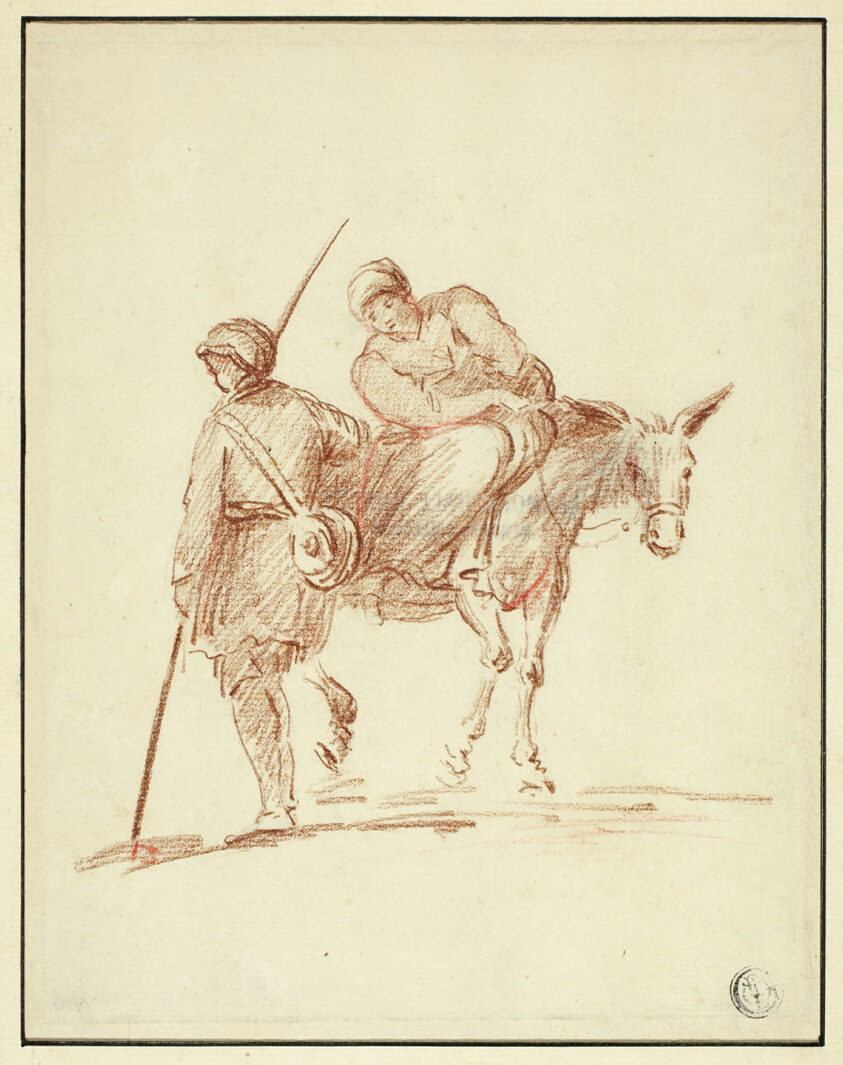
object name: Drawing and Watercolor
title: Woman on Donkey Accompanied by Man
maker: Follower of Nicolaes Pietersz. Berchem (Dutch, 1620-1683); or style of Hubert Robert (French, 1733-1808); or an unknown French artist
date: 1640/1799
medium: Red chalk heightened with graphite and red pastel, on ivory laid paper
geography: Holland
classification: chalk; drawings (visual works); prints and drawing